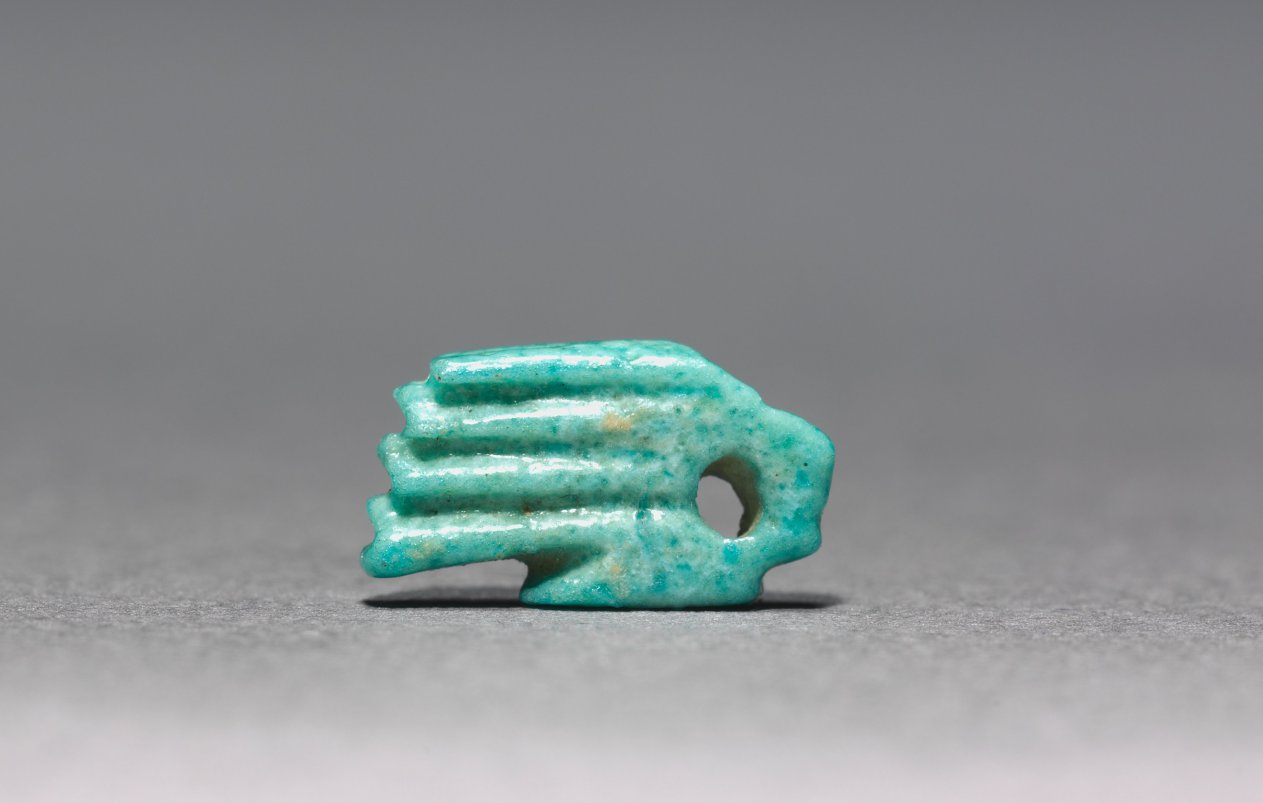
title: Hand Amulet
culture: Egypt, Late period (715–332 BCE)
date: 715–332 BCE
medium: light turquoise green faience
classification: Amulets